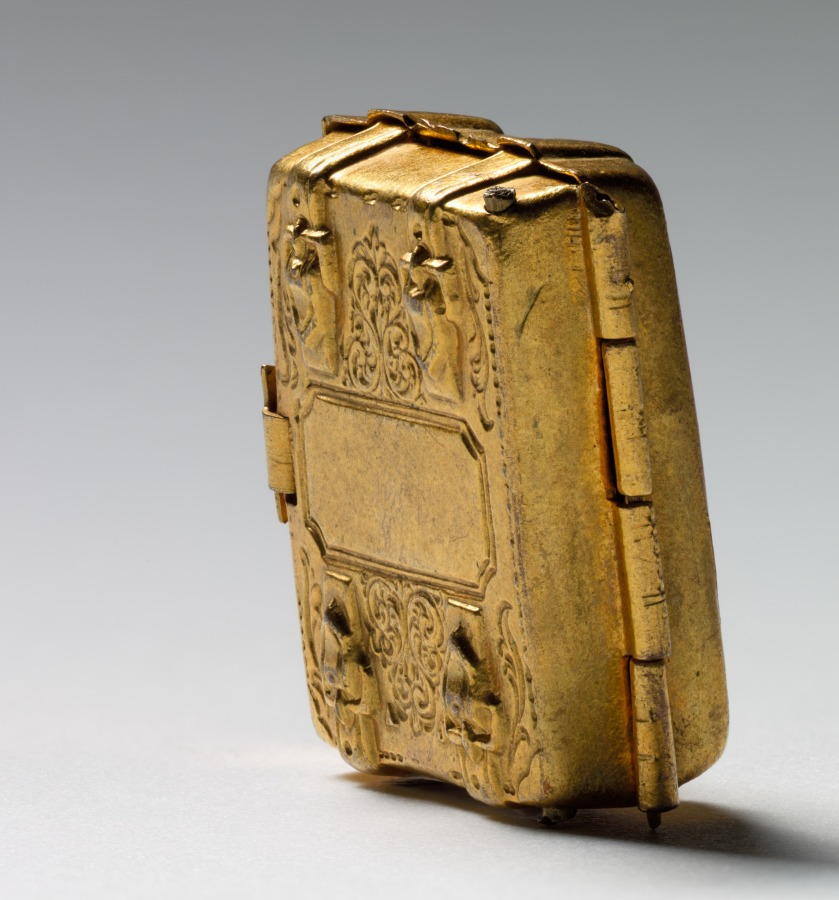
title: Somebody's Luggage (Miniature Wedding Album of Tom Thumb and Lavinia Warren)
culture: America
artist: Mathew Brady (American, 1823–1896)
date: c. 1863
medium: brass photographic locket with 12 miniature albumen prints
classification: Jewelry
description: This deluxe commercial souvenir commemorates the marriage of “General” Tom Thumb (Charles Sherwood Stratton) and Lavinia Warren, performers at P. T. Barnum’s American Museum. Thumb was such a celebrity that the wedding pushed the Civil War off newspapers’ front pages for days. Cartes-de-visite of the wedding sold in the thousands; Brady even licensed the image to lithographers and other photographers. In one image, Lavinia holds a baby who was borrowed for the photo shoot to suggest her domestic skills. The locket is shaped like a miniature suitcase bearing the words “Somebody’s Luggage,” the title of an 1862 story by Charles Dickens.